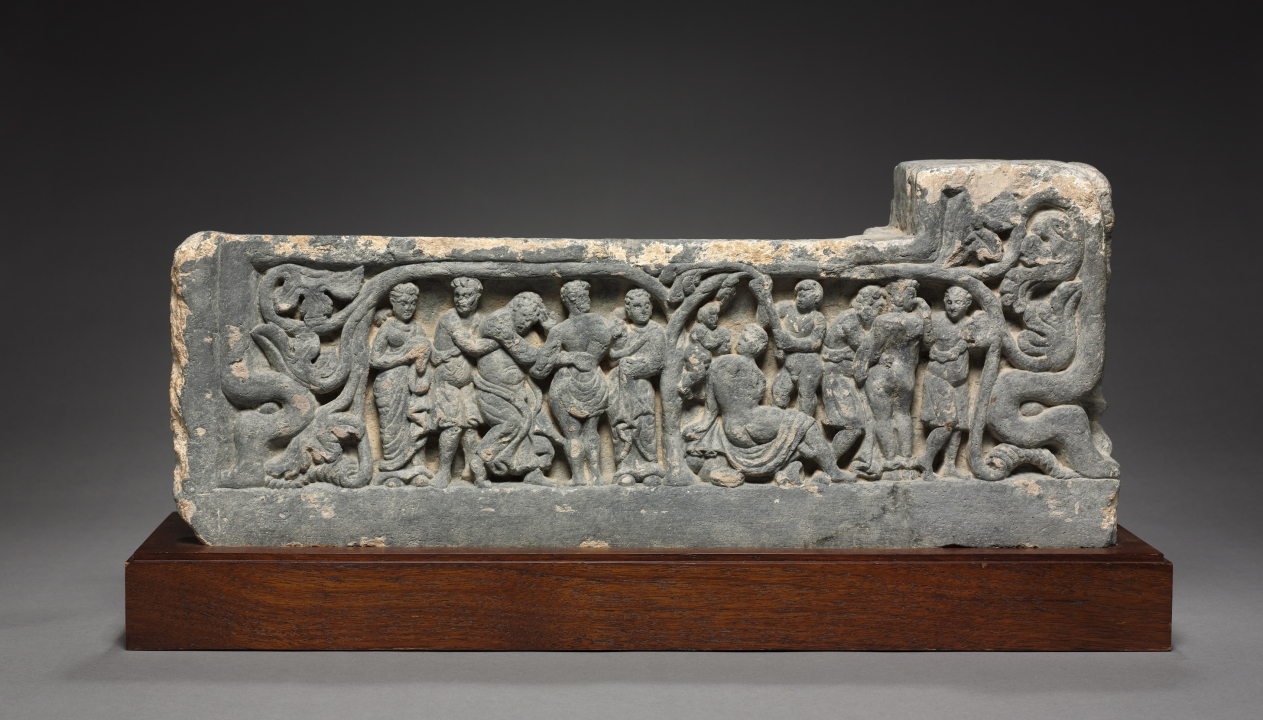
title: Bacchanalian Relief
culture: Pakistan, Gandhara, Kushan period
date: 200s CE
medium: schist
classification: Stone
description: Grape vines create vignettes with scenes of drunken revelry on this architectural carving that once fit by joinery to other carved stone blocks at the base of a Buddhist monument. Bacchus himself, the Greco-Roman god of wine, may be the third figure from the left; bearded, portly, and inebriated, his garment slips as he collapses. Cupid and Aphrodite appear in the vignette on the right next to an amorous couple. On the side is a female nature divinity, grasping the branch of a tree, but unlike her counterparts from farther south in India, she is clothed in a long tunic, pants, and scarf associated with the dress of the Central Asian nomadic groups.